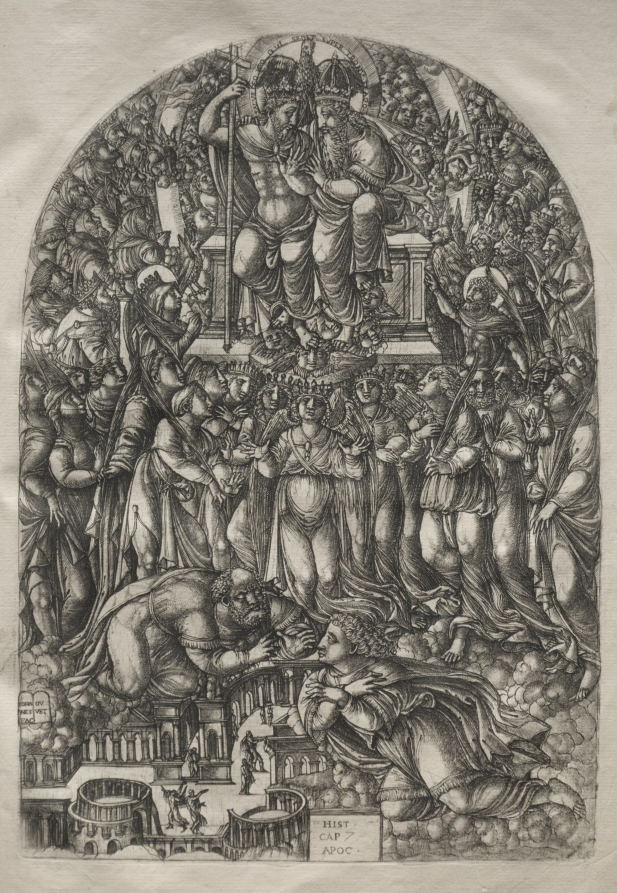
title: The Apocalypse: An Innumerable Multitude Which Stand before the Throne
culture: France, 16th century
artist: Jean Duvet (French, 1485–1561)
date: 1546–1556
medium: engraving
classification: Print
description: This print is part of a bound volume of works illustrating the a narrative of the Apocalypse, taken from the Revelation of Saint John in the Bible. The 23 engravings in the series occupied the artist for a number of years and represent his greatest artistic achievement. The museum's volume is one of only seven known complete sets. Jean Duvet was one of the first major printmakers in France and one of the most original artists of the 1500s. Although he worked mostly in the provincial city of Langres, he became aware of Italian art through the circulation of prints—notably those of Marcantonio Raimondi. His solidly modeled human figures reflect the influence of the Italian High Renaissance. Duvet, however, developed an idiosyncratic, highly artificial style with crowded compositions that ignore rational space in favor of ornamental surface patterns.